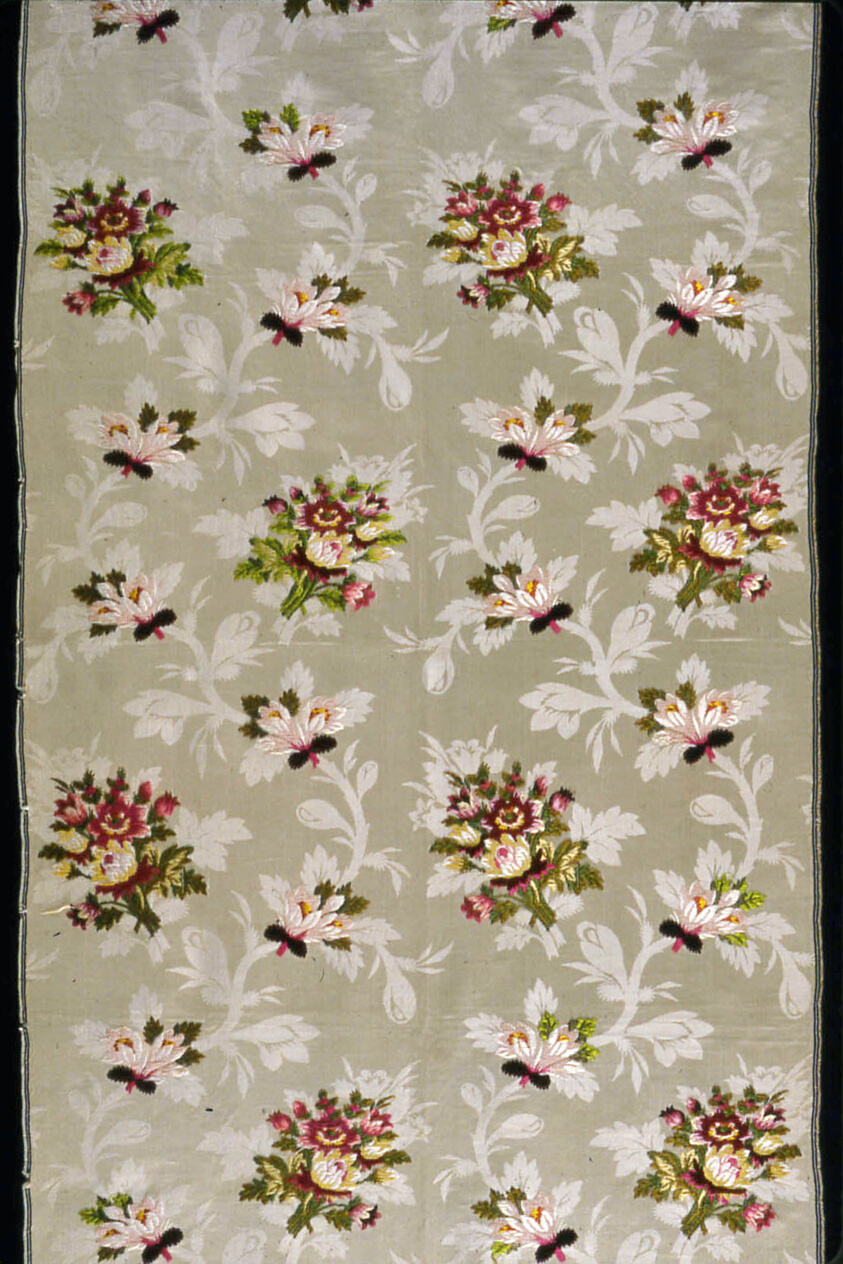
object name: Textile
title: Panel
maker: England, Spitalfields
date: 1752/55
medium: Silk and silk chenille, satin weave with supplementary brocading wefts and self-patterned by reversing of faces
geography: Spitalfields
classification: textile; weaving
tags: floral arrangements